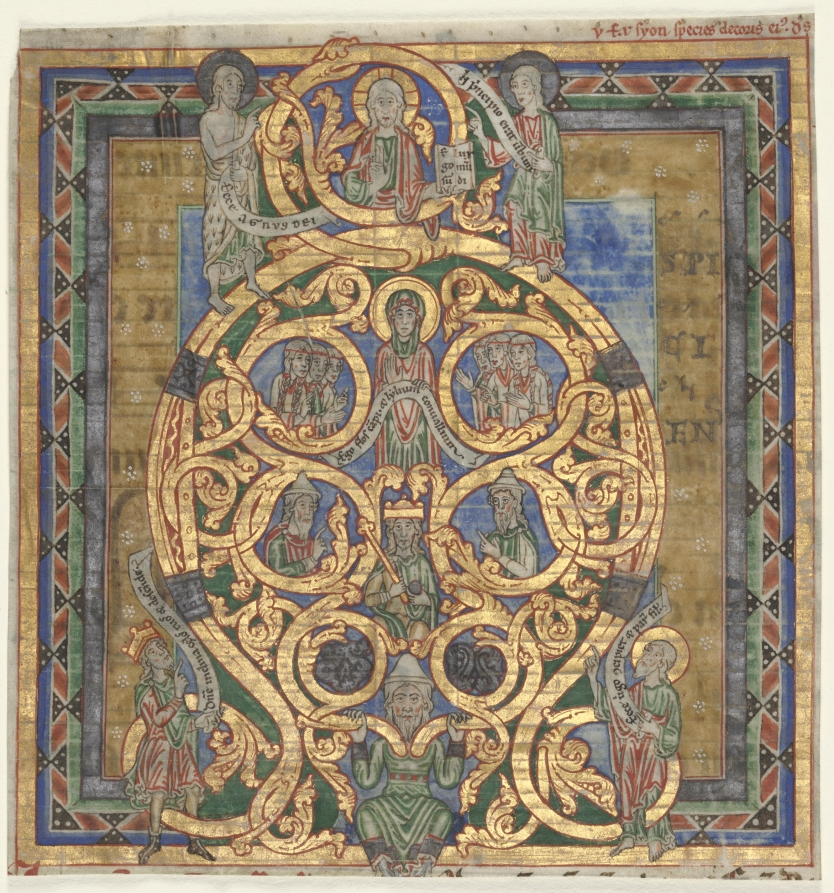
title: Cutting from an Antiphonary: Initial A[spiciens a longe]: The Tree of Jesse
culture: Germany, Meuse Valley, 12th century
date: c. 1115–1125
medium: ink, tempera, and gold on vellum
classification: Manuscript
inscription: Ecce Virgo Consipiet et Pariet Filium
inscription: Domine inclina celos tuos et descende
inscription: Ego flos campi et llium convalluim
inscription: Ego sum lux mundi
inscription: In principio erat verbum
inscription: Ecce Agnus Dei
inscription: V (?) ex Syon species decoris eius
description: This complex initial "A" is formed of meandering plant tendrils, neatly and symmetrically placed at the center of a succession of square frames to which the letter is securely attached above and below. The whole forms a Tree of Jesse showing Christ's ancestors beginning with King David (bottom). The text would have begun, "Long have I been watching...." These are the words of Isaiah, who foresaw the coming of Christ. Isaiah's prophecies are the basis for the representations of the Tree of Jesse, often seen in medieval art.